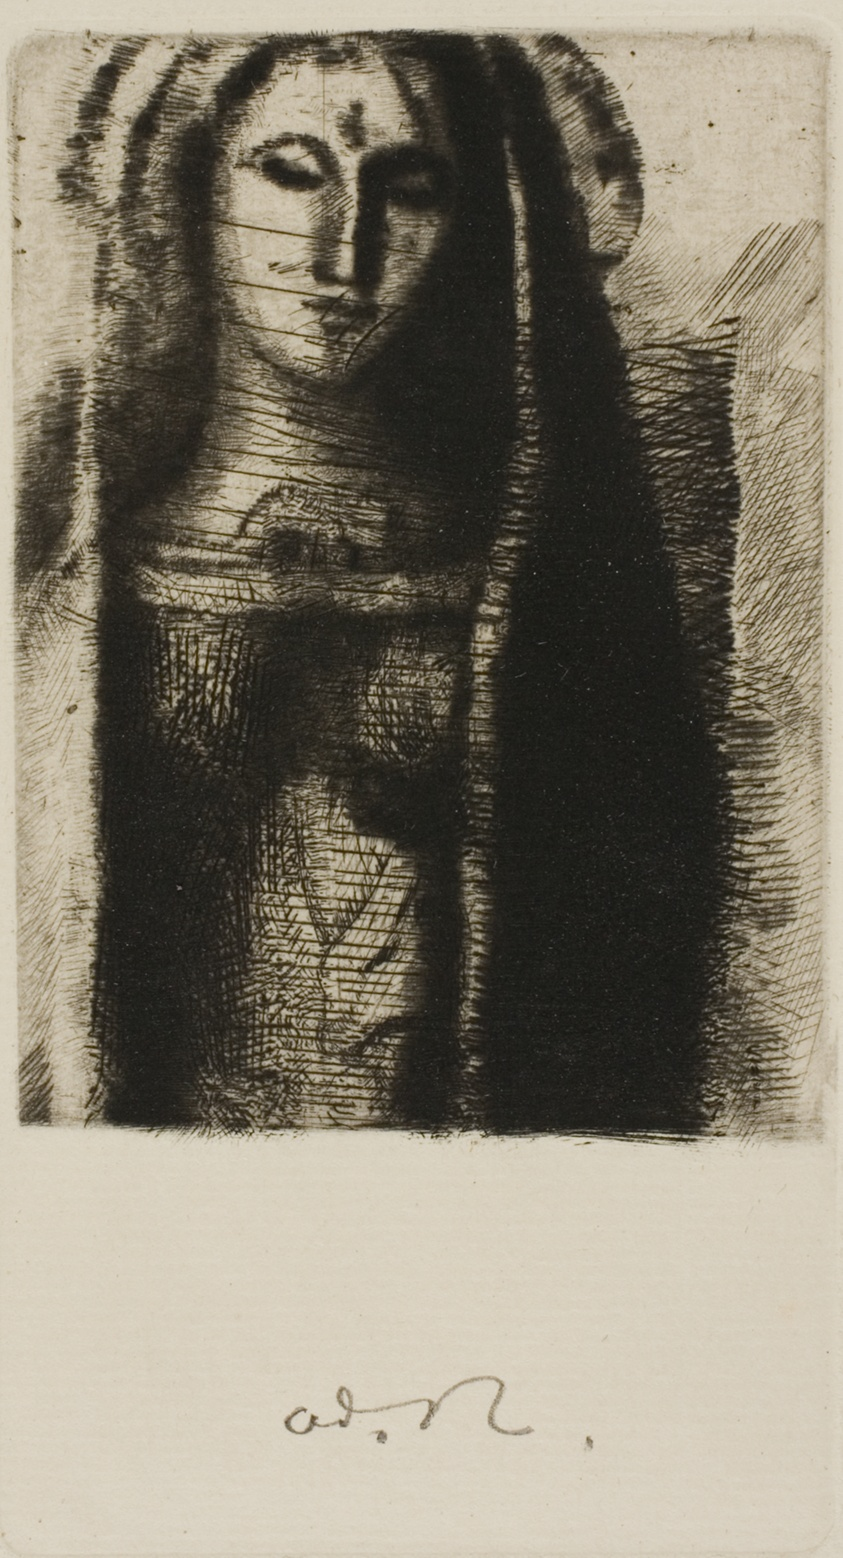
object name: Print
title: Princess Maleine (The Little Madonna)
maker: Odilon Redon (French, 1840-1916)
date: 1892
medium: Etching and drypoint on cream laid paper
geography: France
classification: etching; print; prints and drawing; paper